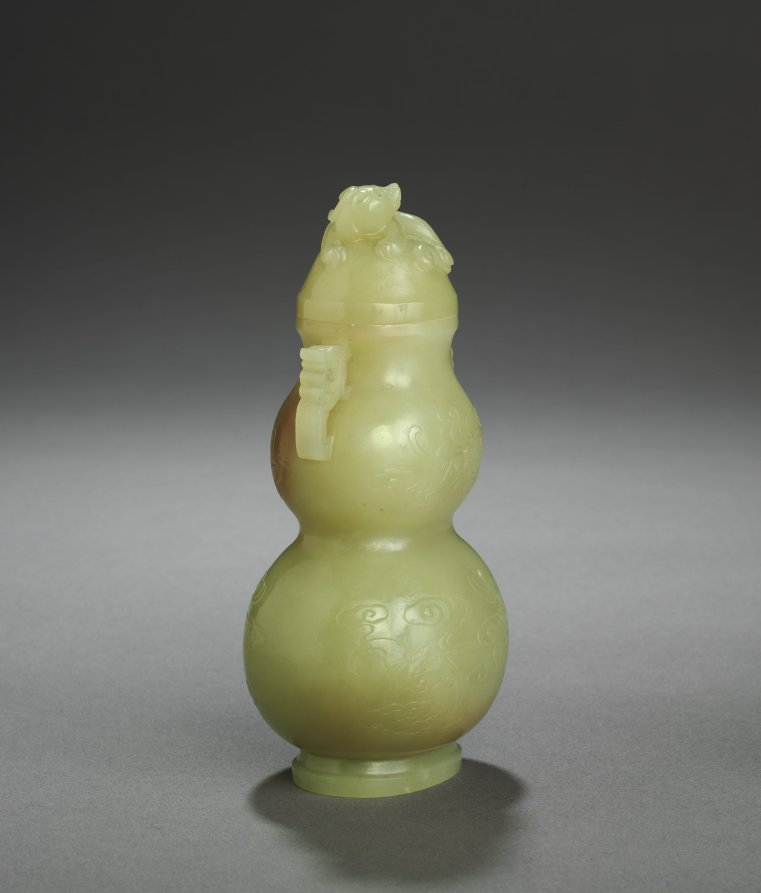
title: Gourd-Shaped Vase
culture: China, Qing dynasty (1644–1911)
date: late 1700s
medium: yellowish-green jade with brown markings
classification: Jade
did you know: Gourds auspiciously reference fertility due to their abundant seeds.